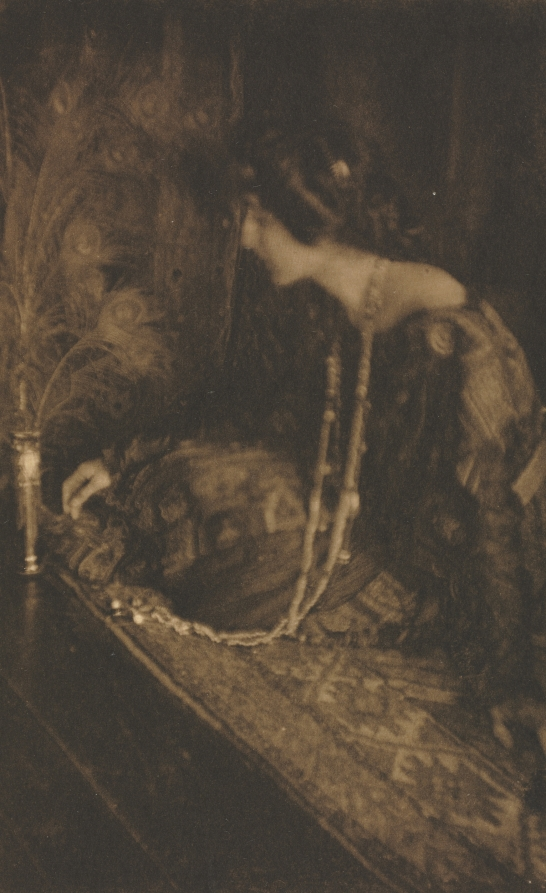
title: Camera Work: Lenore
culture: America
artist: Joseph T. Keiley (American, 1969–1914)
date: 1907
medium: photogravure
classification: Bound Volume